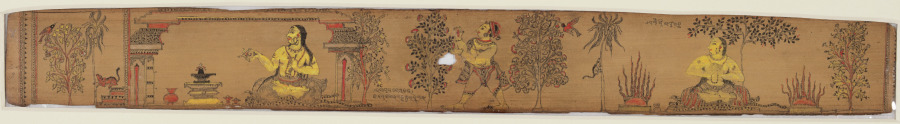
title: A Prince Performs Austerities (recto), from a Romance of Chandrabhanu and Lavanyavati of Upendra Bhanja (1670–1740)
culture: Eastern India, Odisha (formerly Orissa)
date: 1700s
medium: Gum tempera and lampblack on palm leaf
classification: Painting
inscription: kailasakandara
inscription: 1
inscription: e pancagni gartta acchi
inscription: e rajāpua tapasā kari/ sivapūjā kari acchi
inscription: agni jalum accchi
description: In this illustration from the beginning of a popular romance, a prince performed intense austerities and devotions to the Shiva linga in order to obtain a divine woman. He practices yoga surrounded by fires during the hot season and wanders unsheltered during monsoon, as seen on the recto. On the verso, Shiva has answered his prayers and returns home to his "cave on Mount Kailash," as stated in the inscription.